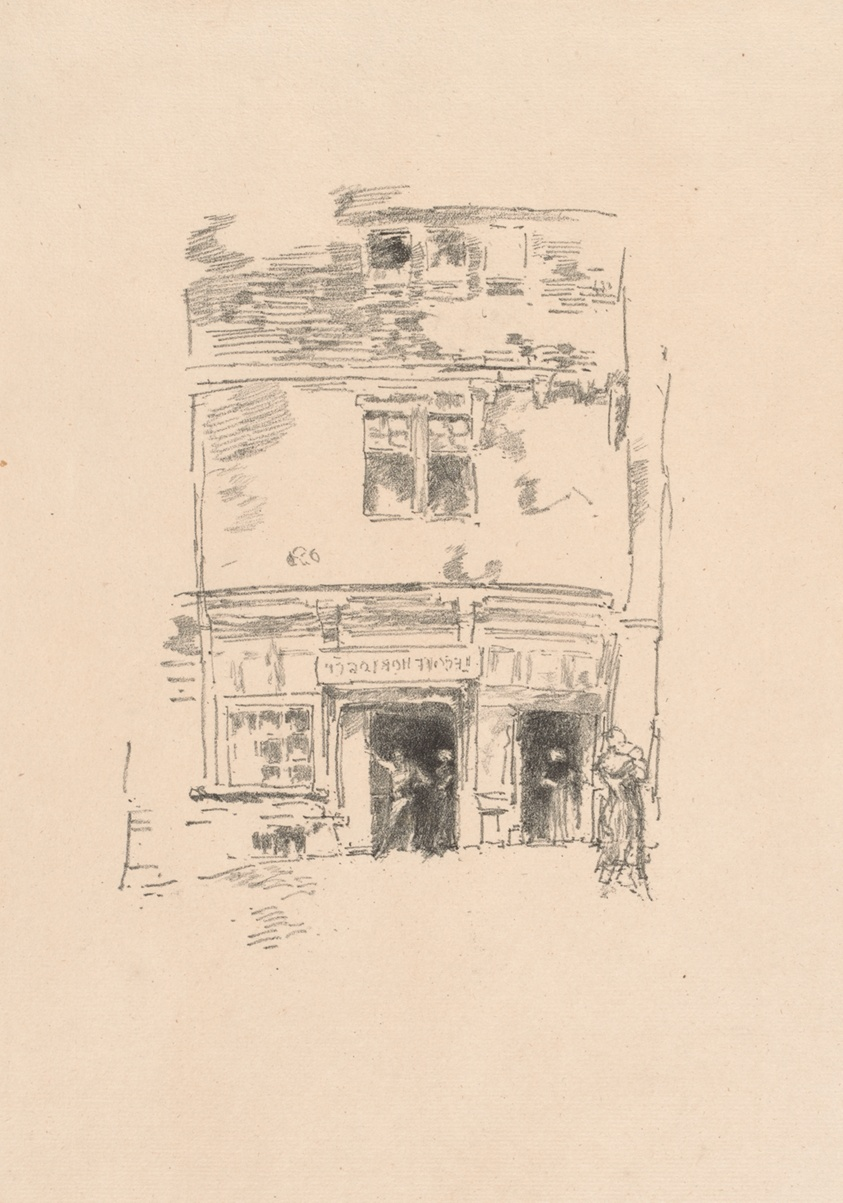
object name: Print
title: The Clock-Makers, Paimpol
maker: James McNeill Whistler (American, 1834-1903)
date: 1893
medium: Transfer lithograph in black on cream laid paper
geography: United States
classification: transfer lithograph; lithograph; print; prints and drawing; paper